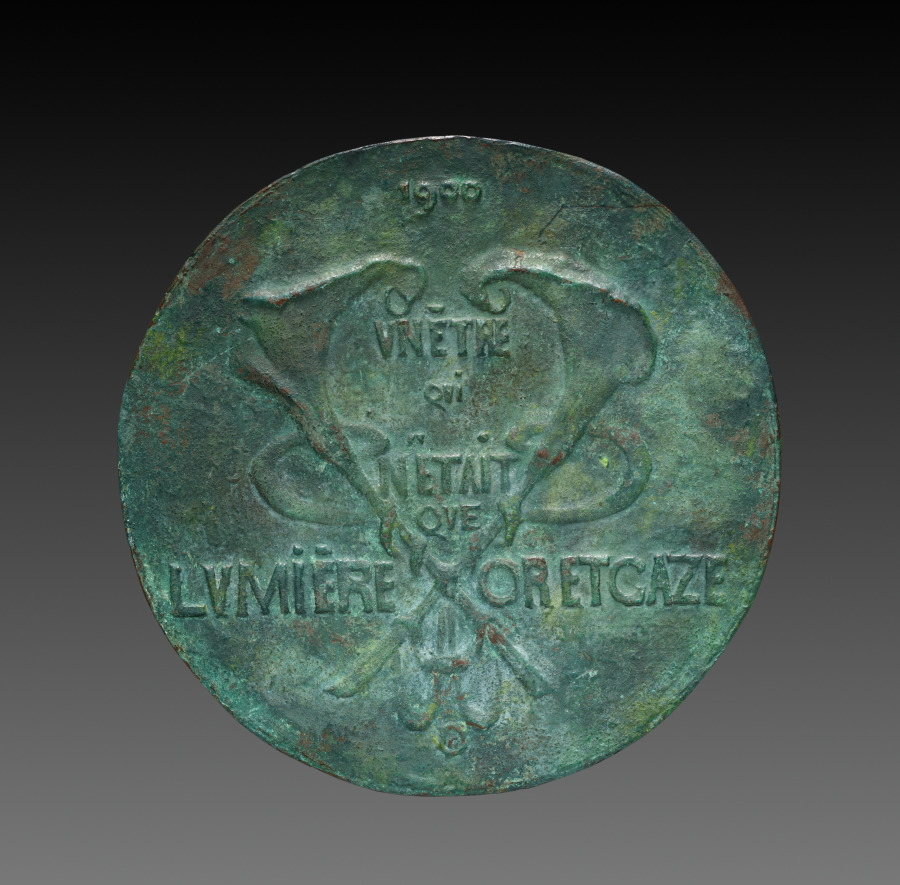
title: Medal: Loïe Fuller (obverse)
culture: France, 20th century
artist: Pierre Roche (French, 1855–1922)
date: 1900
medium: bronze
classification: Metalwork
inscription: "-Fuller-/Loïe."